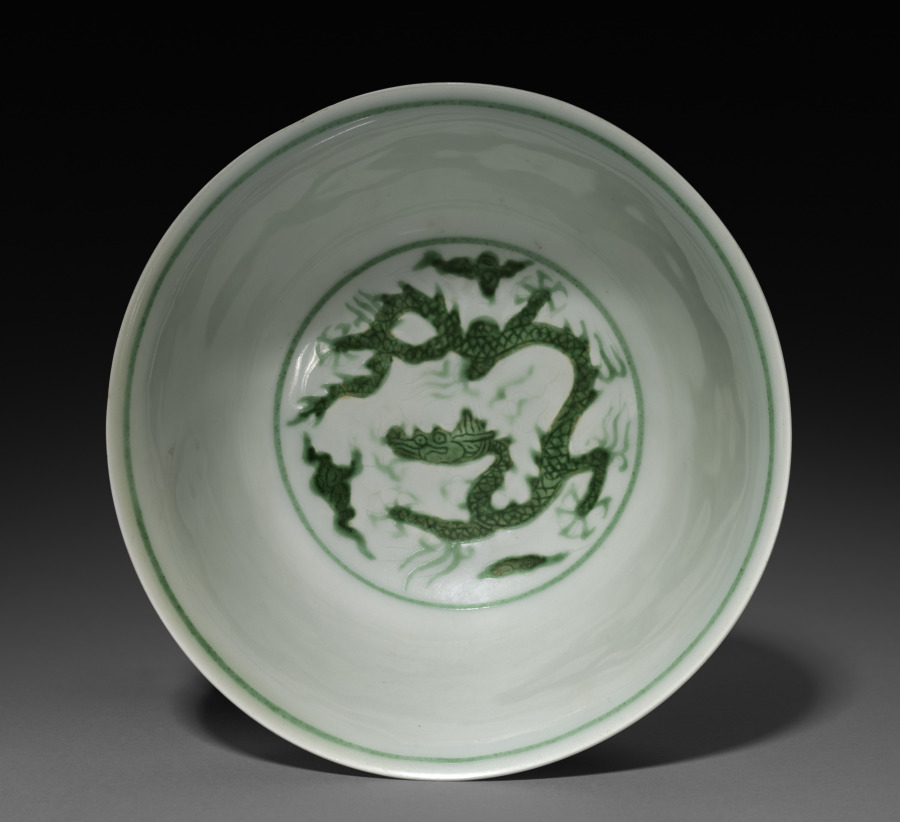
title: Bowl with Dragons in Waves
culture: China, Jiangxi province, Jingdezhen kilns, Ming dynasty (1368-1644), Zhengde mark and reign (1506-21)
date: 1506–21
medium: porcelain with incised decoration and green overglaze enamel and resist enamel decoration on biscuit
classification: Ceramic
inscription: 大明正德年製